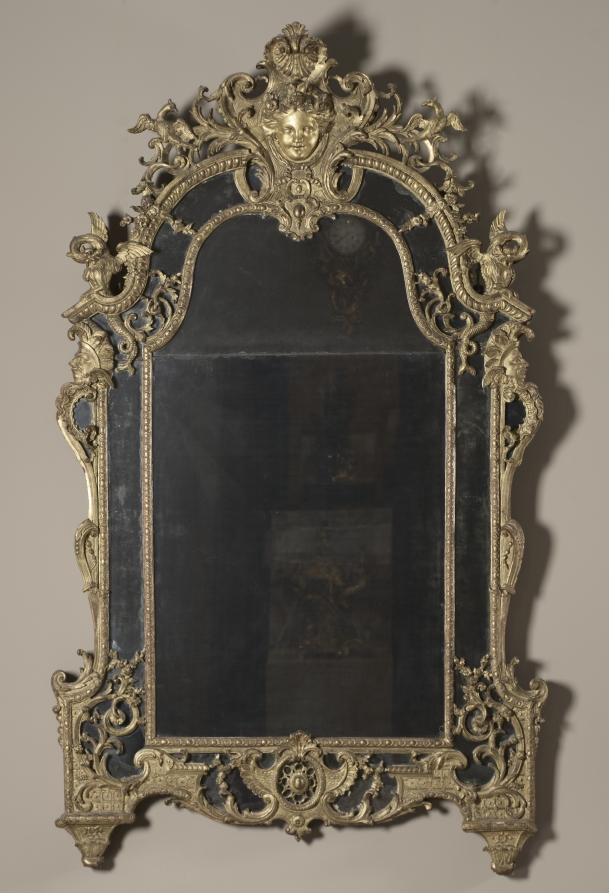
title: Wall Mirror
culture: France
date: c. 1720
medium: carved and gilded wood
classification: Furniture and woodwork